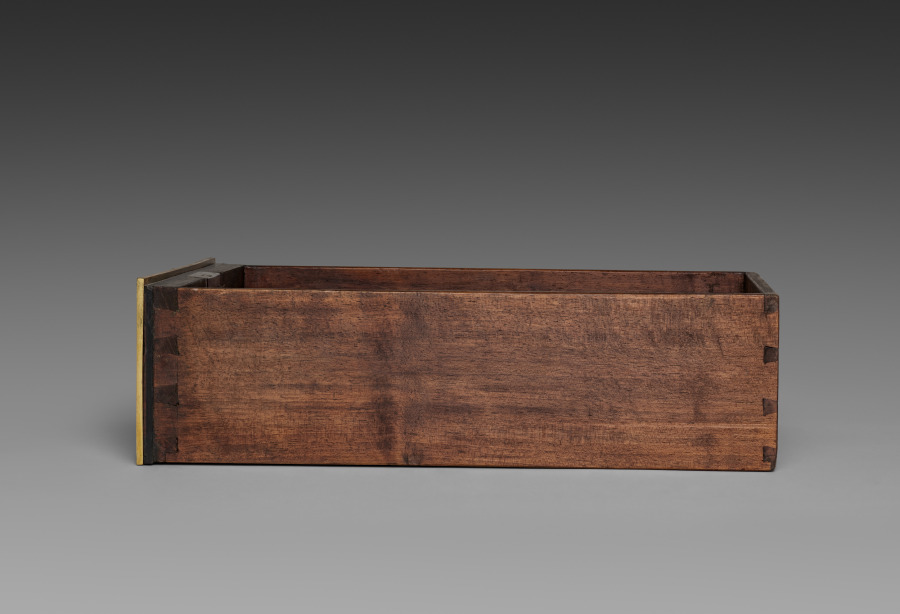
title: Side Drawer for Cabinet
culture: France, late 17th Century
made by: André-Charles Boulle (French, 1642–1732)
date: c. 1690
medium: ebony, marquetry in metal and tortoise shell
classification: Furniture and woodwork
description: Appointed cabinetmaker to King Louis XIV in 1672, André-Charles Boulle became a master of furniture making in France during the late 1600s until his death in 1732. Known primarily for his use of marquetry, in which metal patterns are inlaid into tortoiseshell then applied within the veneered surface of the furniture, Boulle established a level of quality and craftsmanship few others could achieve. As a result, his work found favor at the royal court and among other aristocrats and diplomats eager to impress the king. The inclusion of a medallion depicting Louis XIV within the bronze decoration of this chest would have identified the owner with the royal court. Often exhibiting stout architectural proportions with elegant groups of inlaid motifs such as the parrot on the central panel of this chest, Boulle’s designs are an example of the intellectual fashion for contrasting ideas, materials, and motifs.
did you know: Originally designed to sit atop an elaborate tall stand, this chest was likely altered in the late 1700s to reduce its scale and height.